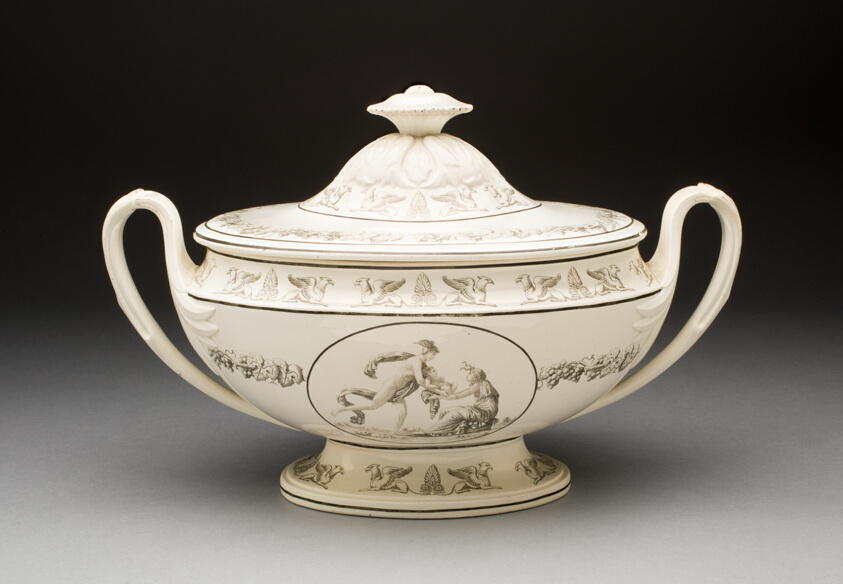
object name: Ceramics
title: Tureen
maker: Creil Pottery (French, 1801-1840)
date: 1810/20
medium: Earthenware with transfer-printed decoration (creamware)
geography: Creil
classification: earthenware; creamware; european decorative arts; ceramics